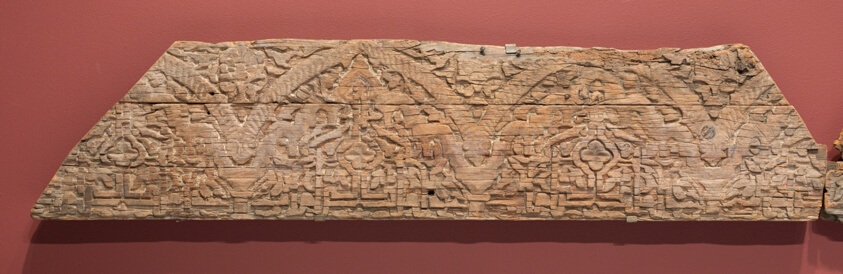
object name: Architectural fragment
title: Carved Wooden Panel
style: Islamic (culture or style)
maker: Morocco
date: Marinid dynasty (1244–1465), 14th century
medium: Carved wood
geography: Morocco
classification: wood; architectural fragment; asian art